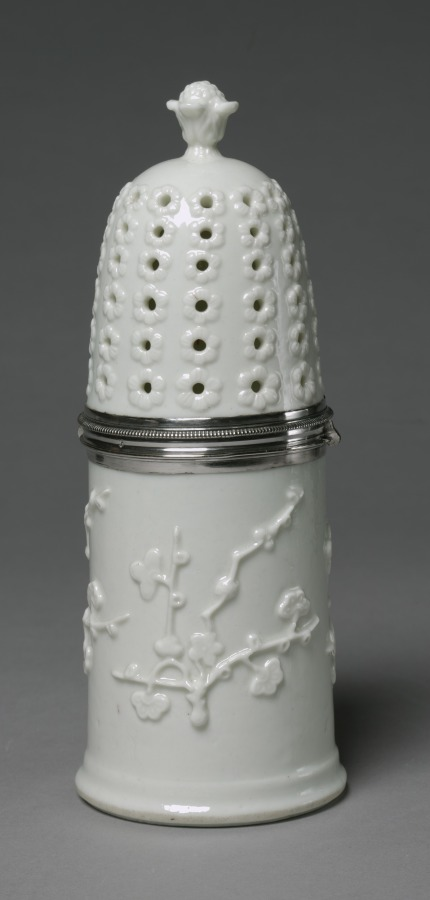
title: Caster (Saupoudreuse)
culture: France, Saint Cloud, 18th century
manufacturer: Saint Cloud Porcelain Factory (French)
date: c. 1732–38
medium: soft-paste porcelain, silver mount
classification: Ceramic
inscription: [Discharge mark of Hubert Louvet, 1732-1738 (Dog's head in profile), on both sections of silver mount]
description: This cylindrical caster with a removable pierced cover may have held sugar. It likely derives its form from silver casters manufactured pre-1700. Its all-white, molded, prunus branch decorations are characteristic of blanc de chine, the term used in France to reference the highly prized porcelain produced in the southeastern Fujian province of Dehua, China, known for its pure color and high degree of translucence.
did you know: Prunus branches, which refer to flowering trees and shrubs including plums, cherries, peaches, nectarines, apricots, and almonds, were a common motif in Chinese porcelain.